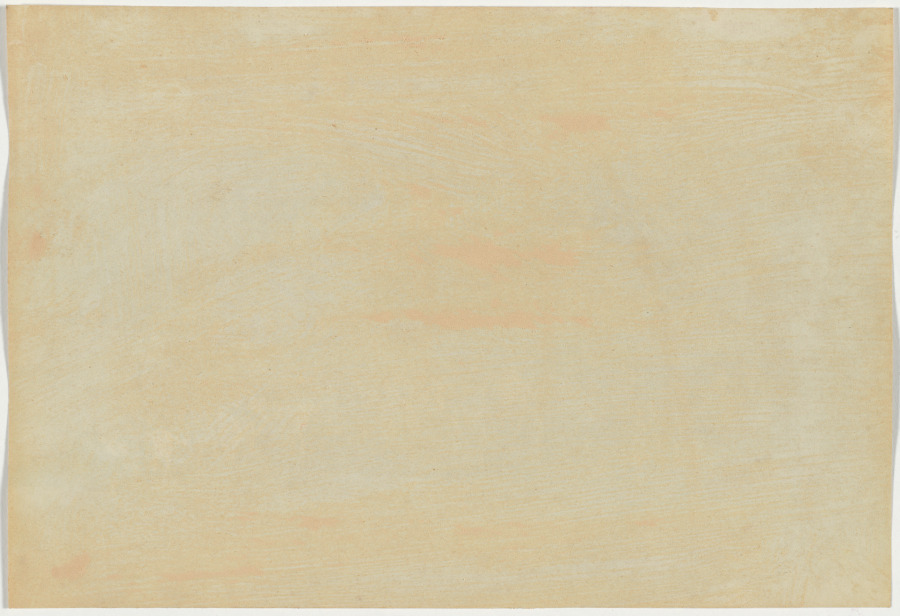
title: Heavy Field Battery, Jhansi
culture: India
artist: Raja Deen Dayal (Indian, 1844–1905)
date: 1886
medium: albumen print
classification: Photograph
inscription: No visible inscriptions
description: Exercises involving elephant batteries, which were exotic to European eyes, attracted spectators; photographs of them were excellent souvenirs of these military forces employed by the British Indian Army. Elephants had been employed in warfare in India since at least the 500s BC, but with the advent of heavy artillery, their function switched from attack to support. They transported big guns and supplies and worked in logging and construction. It took many cattle to pull a load that could be handled by two elephants.